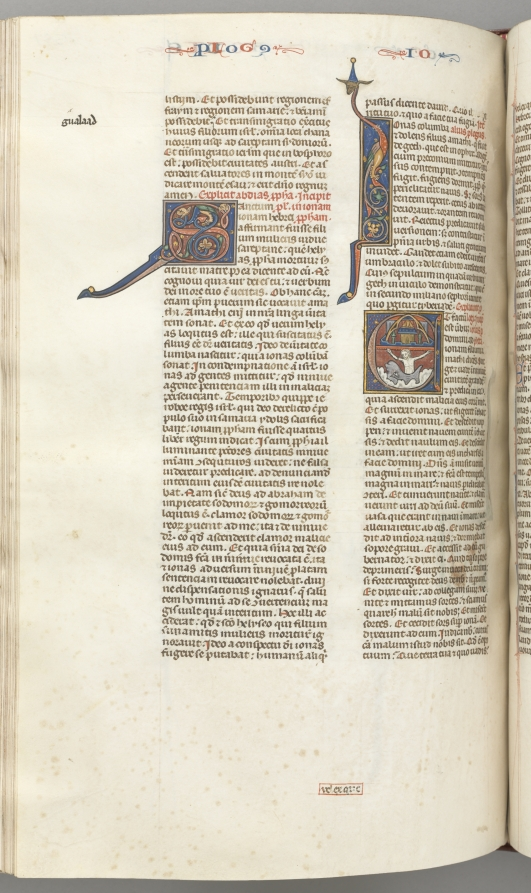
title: Fol. 357v, Jonah, historiated initial E, Jonah swallowed by the whale, a walled city above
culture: Southern France, Toulouse(?), 13th century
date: c. 1275–1300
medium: ink, tempera and gold on vellum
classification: Bound Volume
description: Biblical manuscripts were highly prized and important possessions of churches, monasteries, cathedral schools, and universities throughout medieval Europe. The biblical texts were known as the vulgate, the translations made by Saint Jerome in the fourth century from Hebrew and Greek into Latin, which became the definitive and official Latin version of the Roman Church. In the 13th century, the bible was, for the first time, produced as a single volume with an officially sanctioned sequence to its books and chapters as illustrated by this example. The very extensive decoration of this bible is arranged hierarchically to indicate the relative importance of the various texts so that full or almost full-page initials mark the openings of the first prologue, Genesis, and the first Gospel; historiated initials mark the beginning of each book and illuminated initials mark the Prologues.